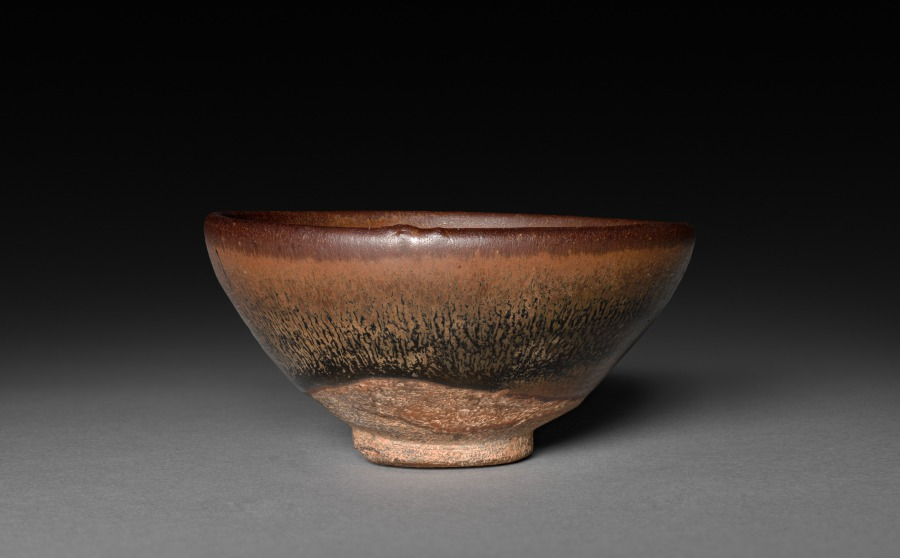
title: Tea Bowl: Jian ware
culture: China, near Shui ch'i, Song dynasty (960-1279)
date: 960–1279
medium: purplish brown stoneware with iron slip glaze coating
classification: Ceramic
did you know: Jian ware was very popular with the tea cultures in China and Japan.